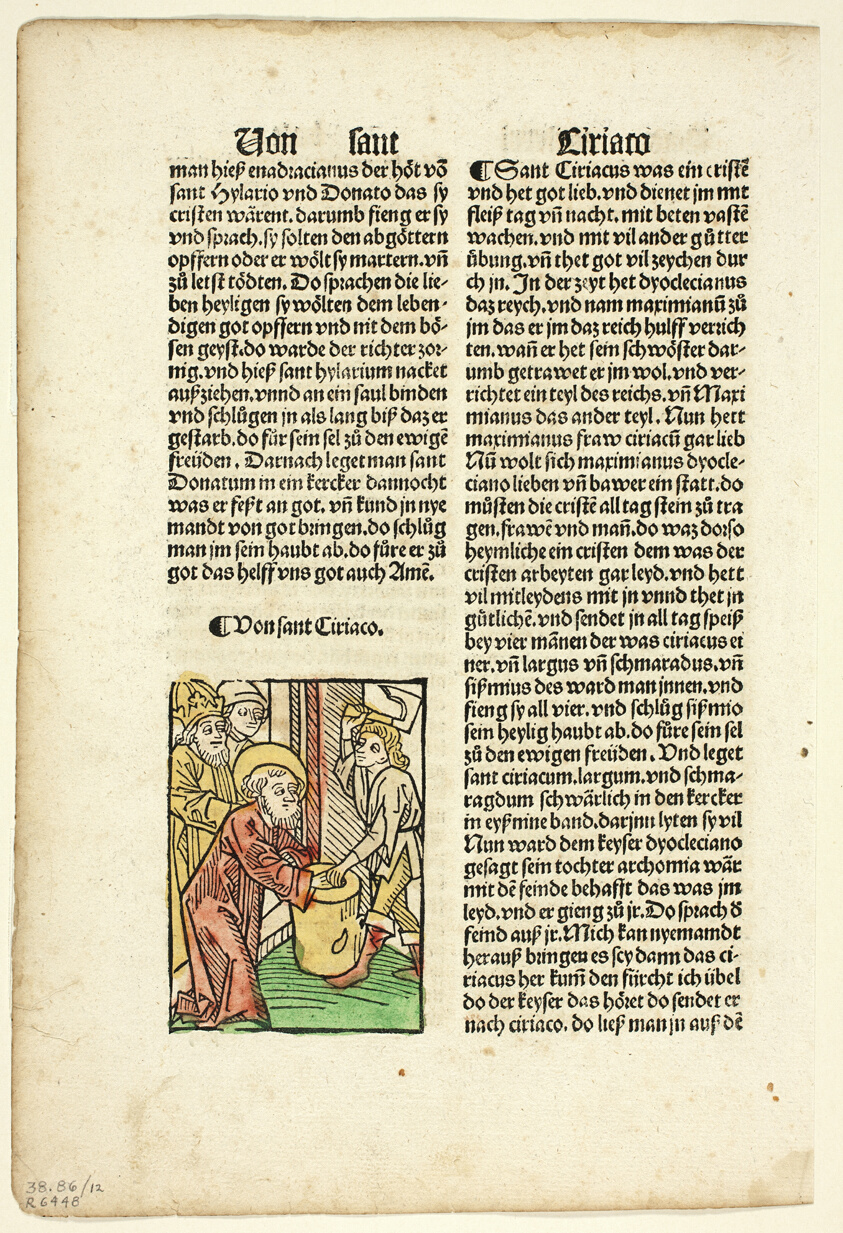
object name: Print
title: Saint Ciriaco from Heiligenleben (The Lives of Saints), Plate 12 from Woodcuts from Books of the 15th Century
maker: Unknown Artist (Augsburg, 15th century); printed and published by Johann Schönsperger the Elder (German, c. 1455–1521); original text by Jacobus de Voragine (Italian, c. 1230–1298); portfolio text by Wilhelm Ludwig Schreiber (German, 1855–1932)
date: 1497, portfolio assembled 1929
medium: Woodcut in black with hand-colored additions, and letterpress in black (recto and verso), on cream laid paper, tipped onto cream wove paper mat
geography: Germany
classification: woodcut; print; prints and drawing